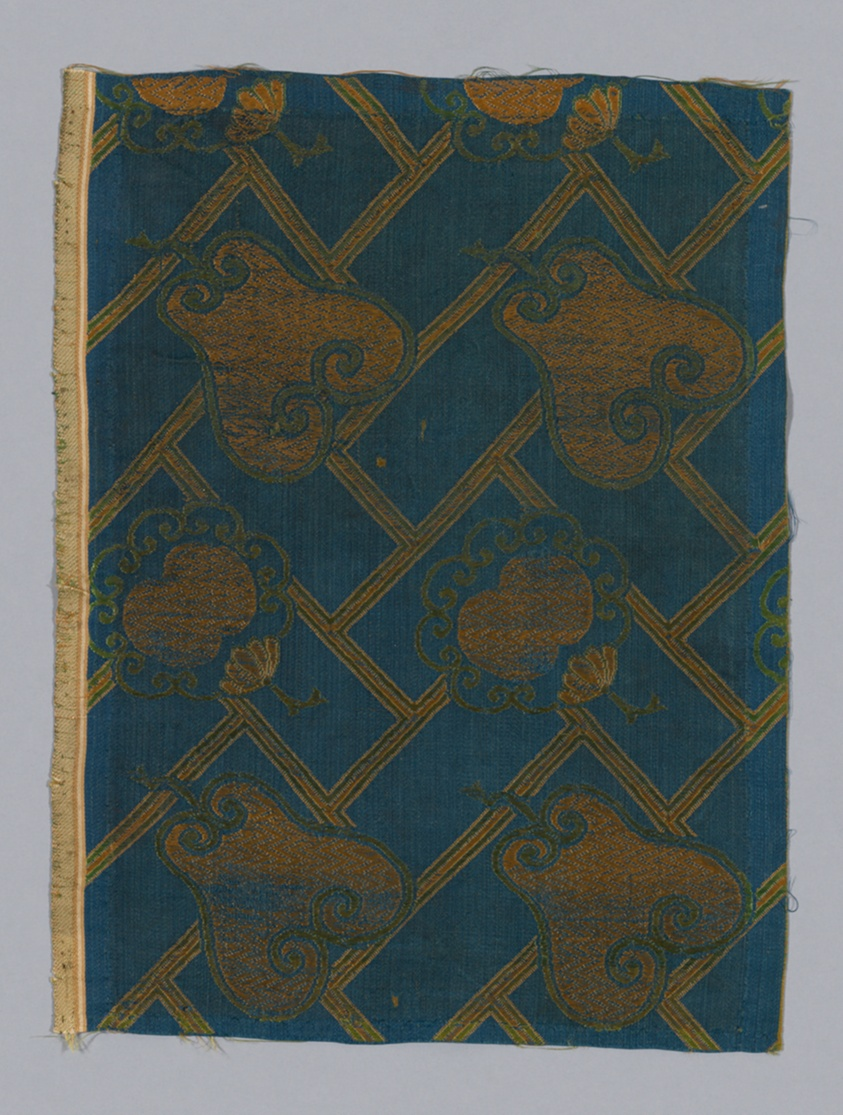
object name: Textile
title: Fragment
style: edo (japanese period)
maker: Japan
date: Edo period (1615–1868), 1675/1700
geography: Japan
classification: textile; weaving